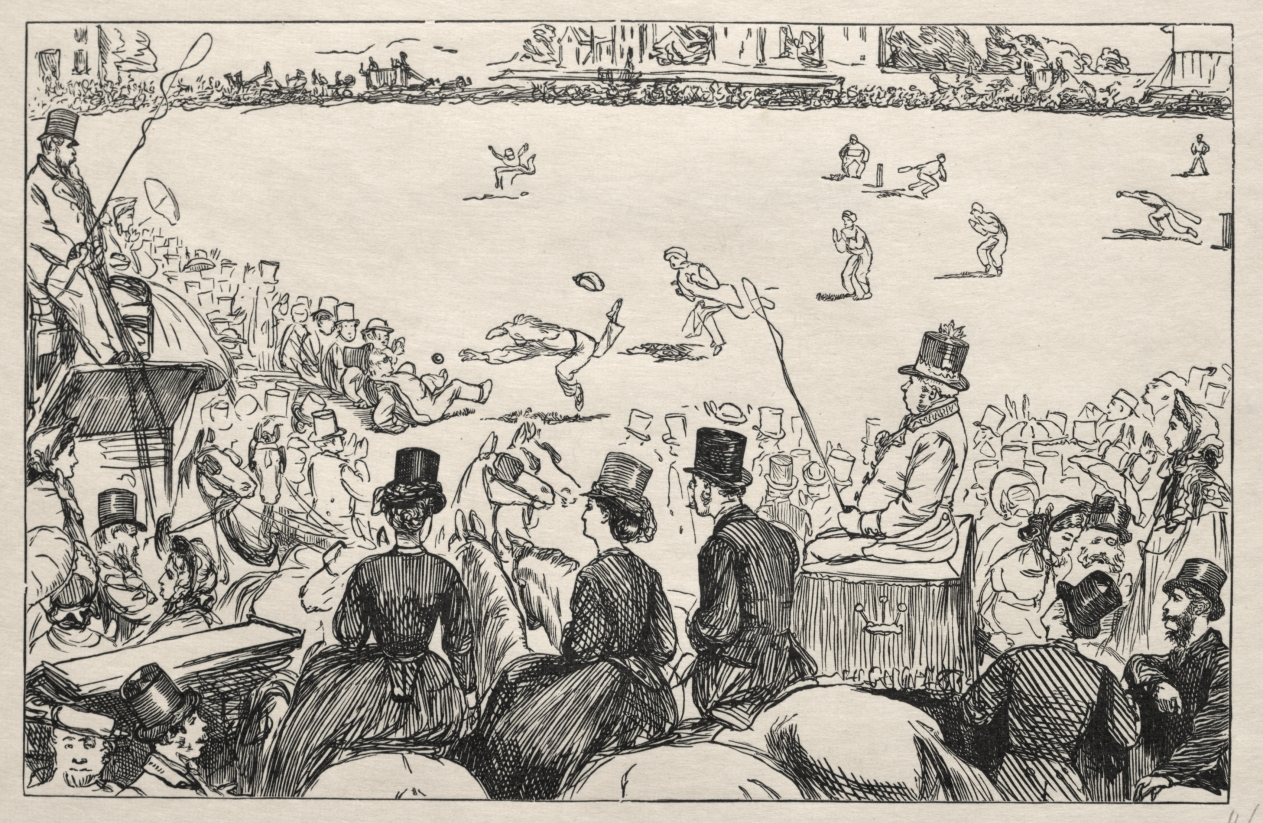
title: University Cricket Match at Lords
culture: England, 19th century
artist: George Louis Palmella Busson Du Maurier (British, 1834–1896)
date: 1862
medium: wood engraving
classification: Print